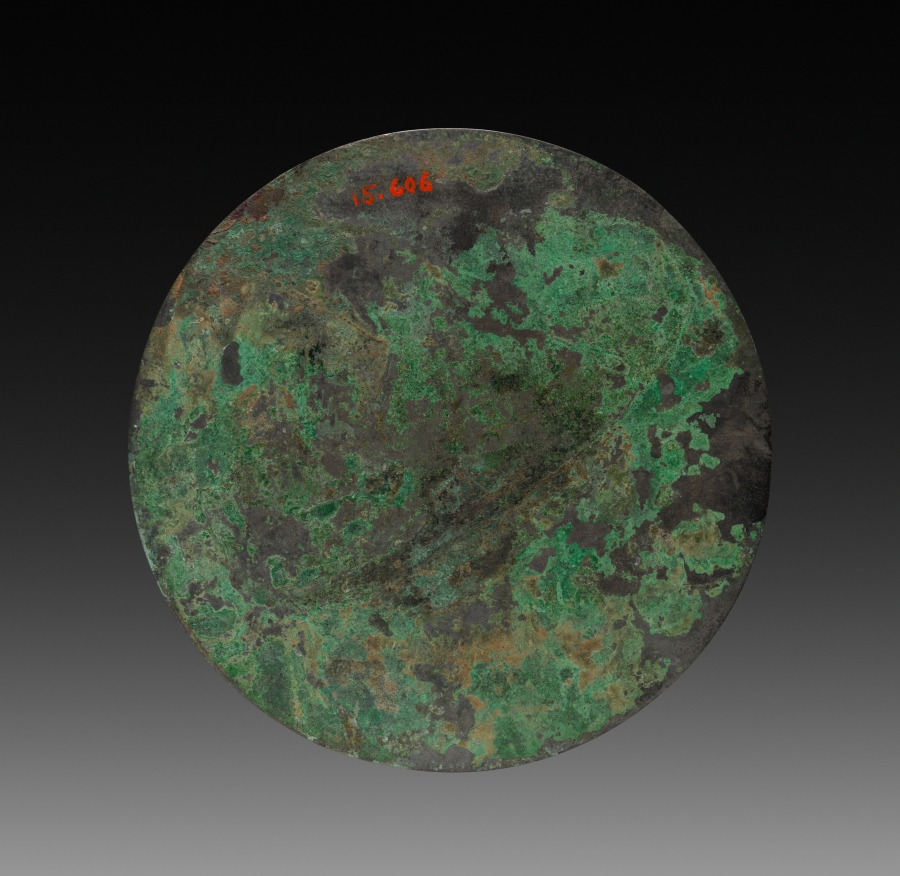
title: Mirror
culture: China, Eastern Han dynasty (25–220 CE)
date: 25–220 CE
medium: bronze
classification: Metalwork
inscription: Mr. Wang has made this mirror; it is true and without blemish. Its decoration is engraved with skilled craftsmanship. May your longevity be like metal and stone; may you have joy without end.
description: Two of the same animals of the Four Directions seen in the "TLV" mirror are cast in high relief and twisted in confrontation: the Dragon of the East with long snout, pointed horn, and scaly backbone meets the Tiger of the West with feline head and striped neck. An amphibious creature of unknown symbolism swims between their tails. The circle between their heads duplicates the form of a copper coin, minted during the Han dynasty, that was strung through its square perforation. The encircling inscription reads: "Mr. Wang has made this mirror; it is true and without blemish. Its decoration is engraved with skilled craftsmanship. May your longevity be like metal and stone; may you have joy without end."